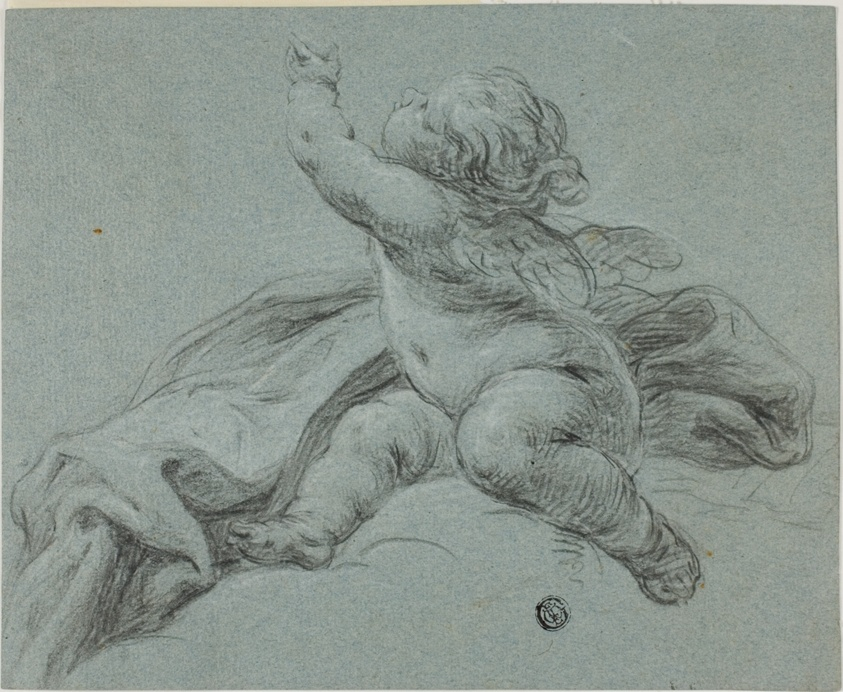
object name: Drawing and Watercolor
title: Putto Seated Beside Drapery, Reaching Upwards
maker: Style of Etienne Parrocel (French, 1696-1776)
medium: Black chalk, heightened with white chalk, on blue laid paper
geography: France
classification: chalk; drawings (visual works); prints and drawing